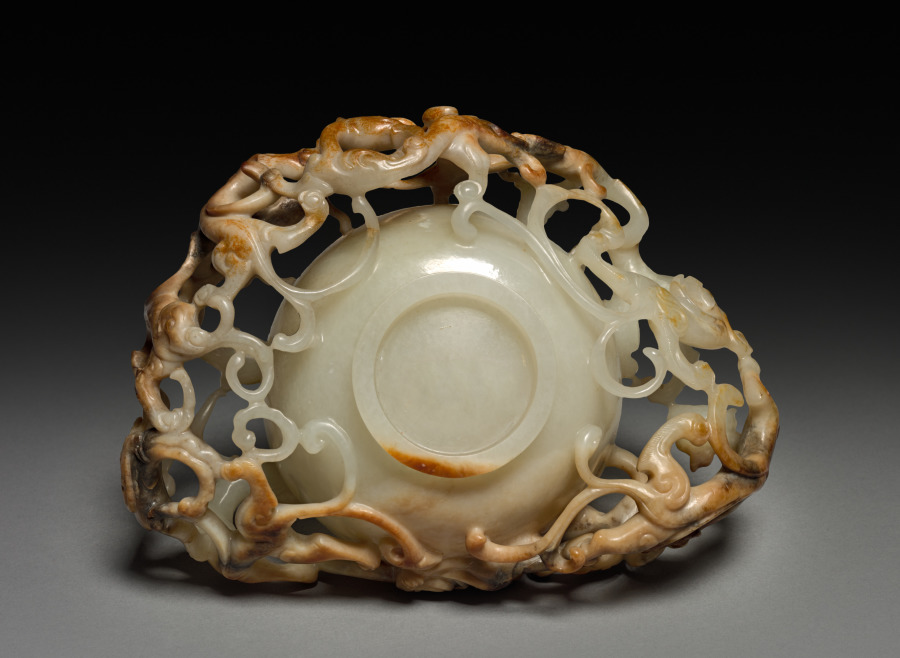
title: Cup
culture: China, Qing dynasty (1644–1911), Qianlong reign (1736–95)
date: 1736–95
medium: jade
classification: Jade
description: In the Qing dynasty, luxury items became more affordable to larger parts of the society, including women, merchants, and literati in nonofficial positions. Imperial patronage and a growing urban population also encouraged consumption of luxury goods and local craftmanship. This cup with open-work interlacing dragons shows the creative mind of the skilled artisan who carved it from a round piece of jade.